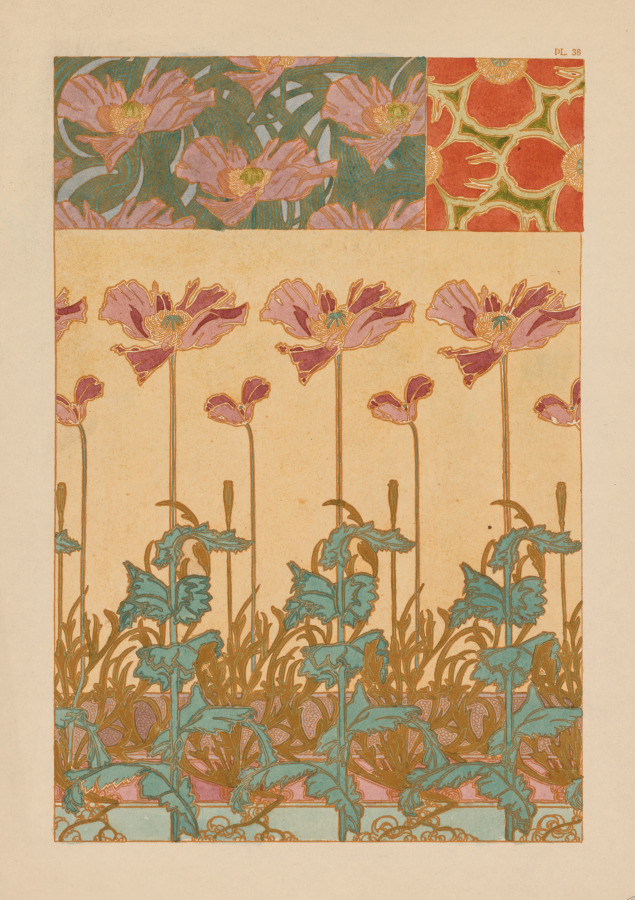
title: Documents Decoratifs: Oriental Poppies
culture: Czechoslovakia, late 19th-early 20th century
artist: Alphonse Mucha (Czech, 1860–1939)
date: 1901–2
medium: lithograph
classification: Print